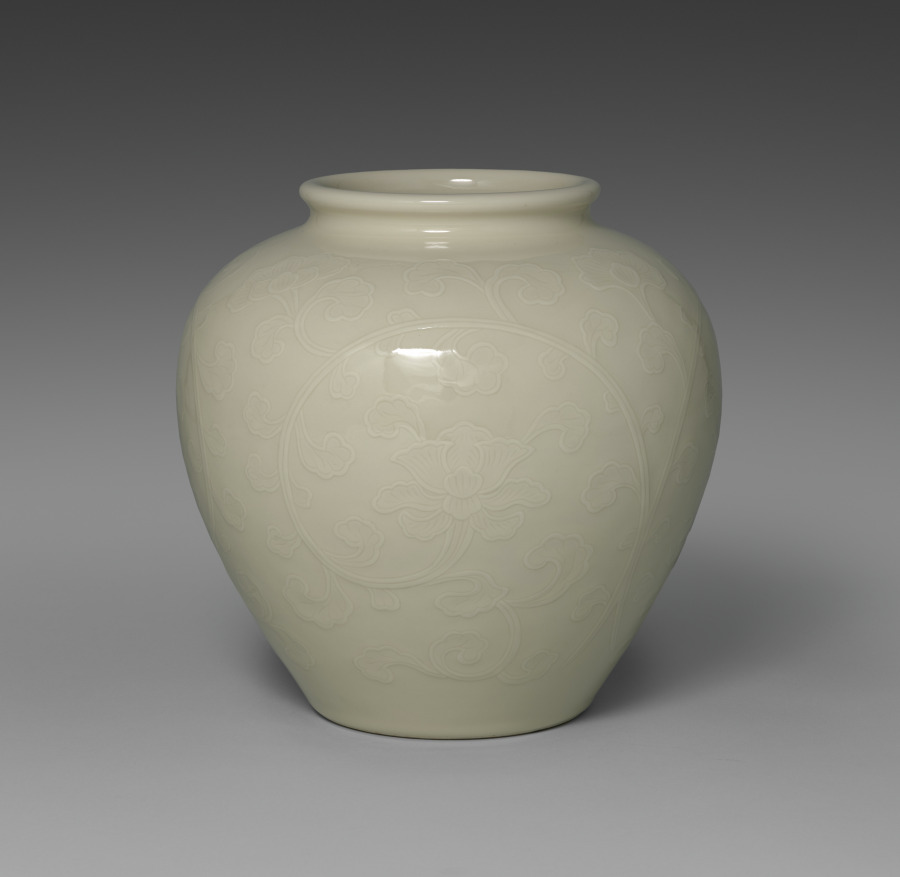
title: Guan-Shaped Vessel with Floral Scroll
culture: Japan, Taishō period (1912–26) or Shōwa period (1926–89)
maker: Seifū Yohei IV (Japanese, 1872–1951)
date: 1914–46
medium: Porcelain with molded and carved design and cream glaze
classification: Ceramic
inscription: 清風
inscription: 清風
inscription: 清風造之 【印】成山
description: Many of the vases created by Yohei III and IV were made with reference to and in emulation of Chinese ceramics in both form and glazing. The Seifu studio was inspired by later Chinese copies of two other archaic vessel types, the hu (Japanese ko) and guan (Japanese kan). In simple terms, in their original contexts, the hu and guan were storage jars that also appeared in ritual contexts. This hefty guan-shaped vase by Yohei IV has a floral scrolling pattern known in Japanese as karakusa, or “Chinese grasses.” The flowers are generally identified as lotus or peony. This flower vase might alternately be categorized as having the form of what is called a shukaiko in Japan, or a large vessel for holding wine. Shukaiko were created as early as the latter part of the Kamakura period after Yuan dynasty examples.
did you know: According to the box lid, the vase is a kanpakuji, "bright-jewel white porcelain," work.